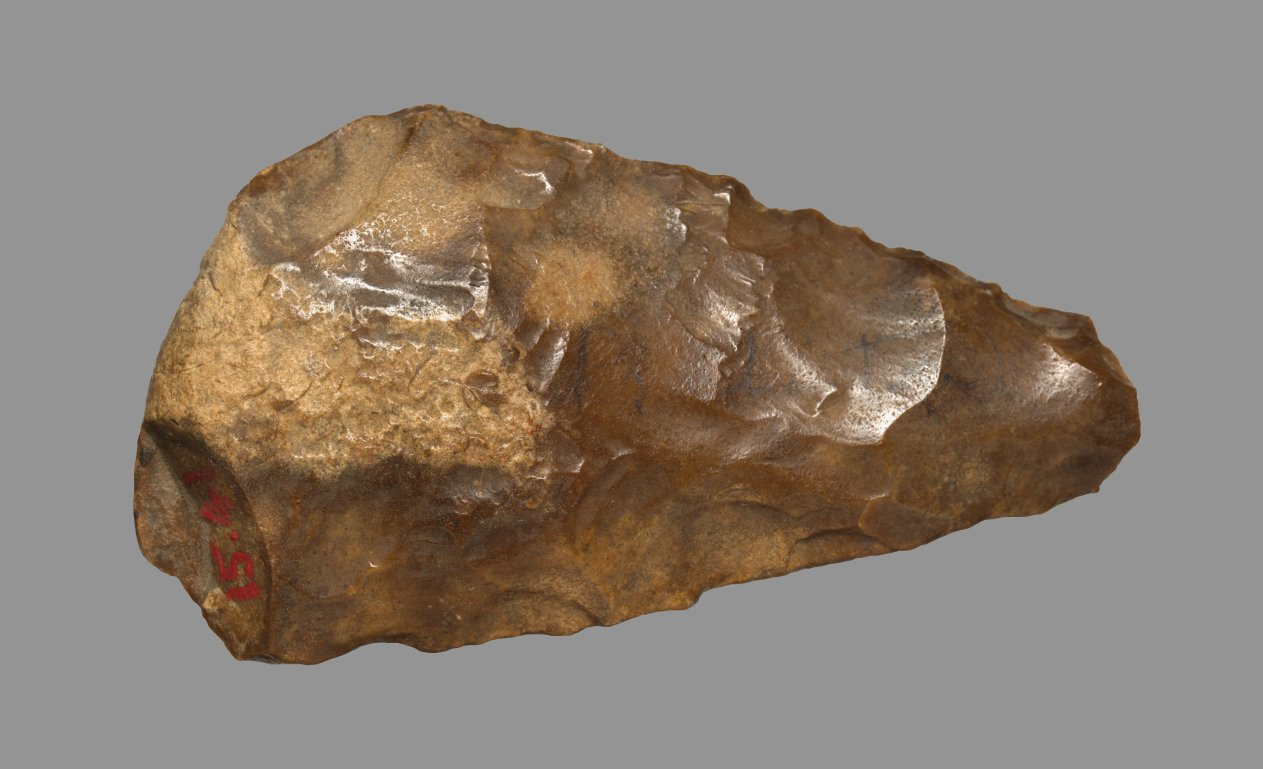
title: Hand Axe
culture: Egypt, Haraga, Paleolithic period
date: before c. 10,000 BCE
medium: dark-brown-colored flint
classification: Implements